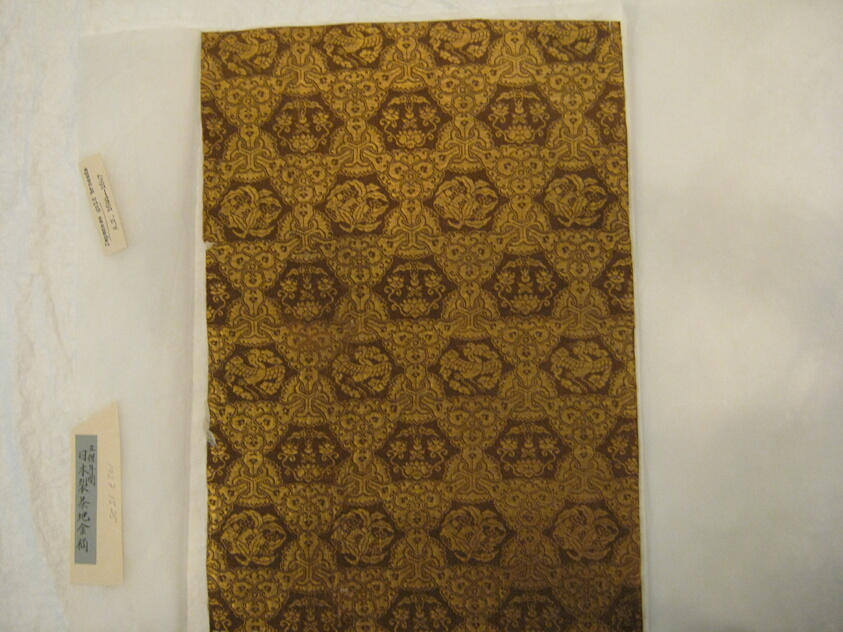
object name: Textile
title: Fragment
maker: Japan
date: late Edo period (1789–1868)/ Meiji period (1868–1912), 19th century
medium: Plain compound twill, silk and gilt paper; 3 strips to m.m.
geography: Japan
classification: textile; weaving